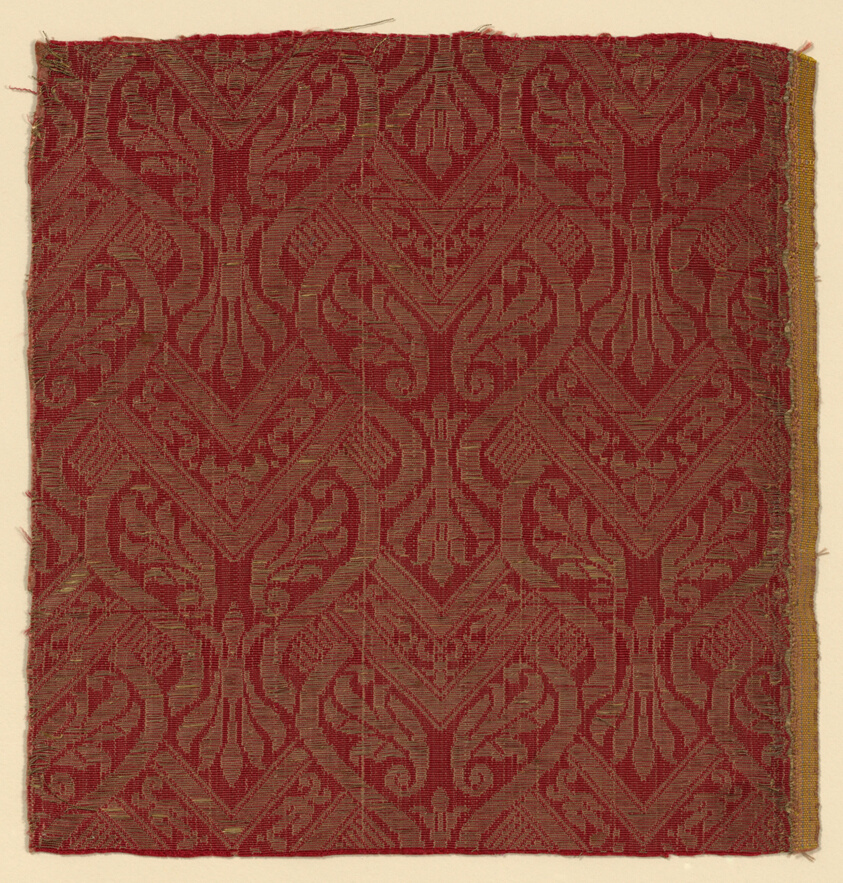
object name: Textile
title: Fragment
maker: Italy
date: 16th century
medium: plain compound cloth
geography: Italy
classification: textile; weaving